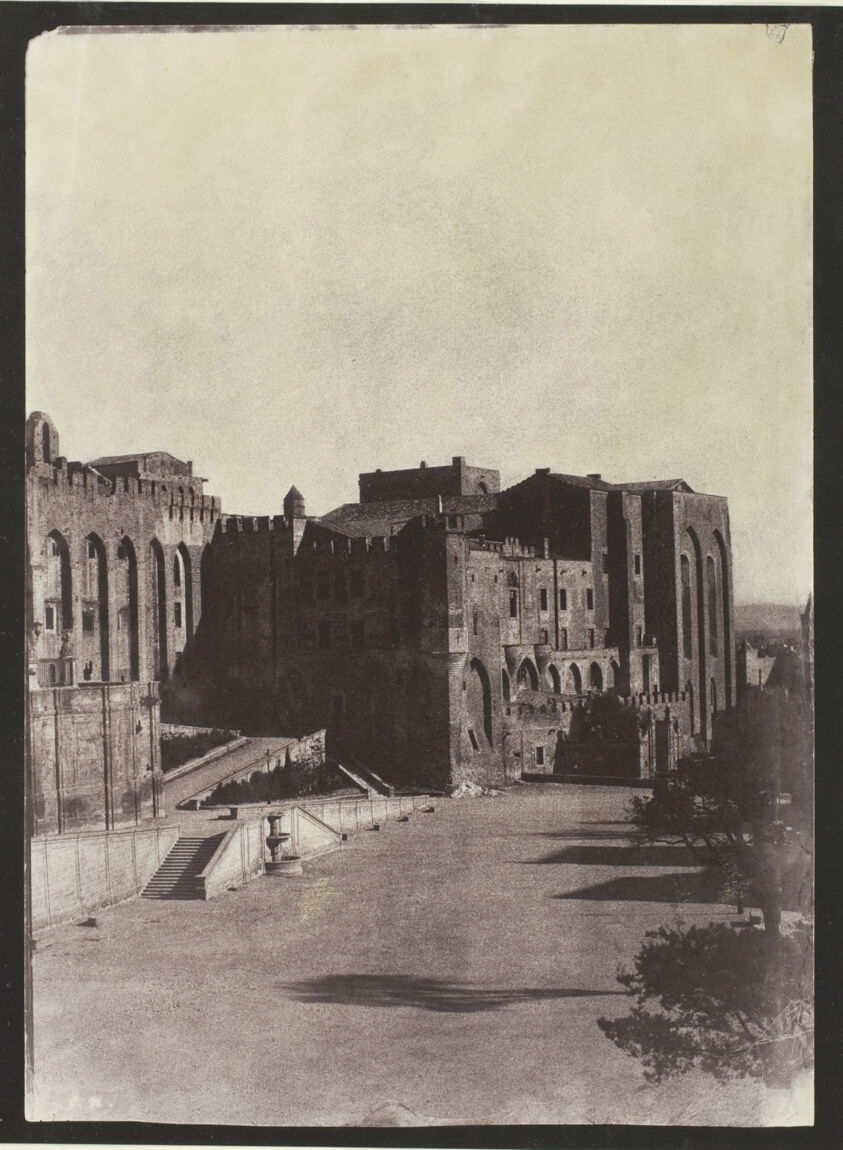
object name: Photograph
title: The Pope's Palace, Avignon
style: 19th century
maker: Charles Nègre (French, 1820–1880) and; Joel Snyder (American, born 1940)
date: c. 1851, printed 1970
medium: Albumen print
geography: France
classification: albumen silver print; photographic process; photography; photograph